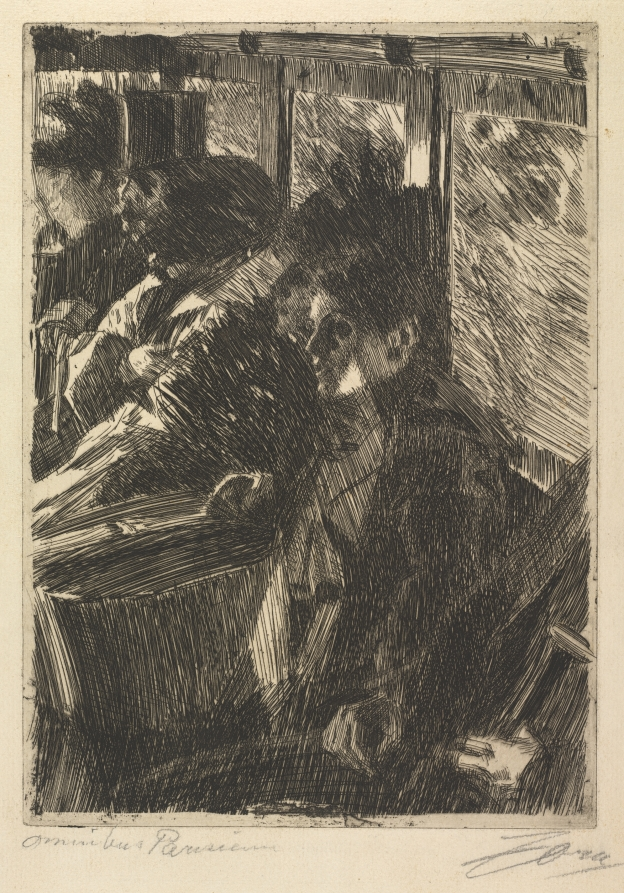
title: Omnibus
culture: Sweden, 19th century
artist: Anders Zorn (Swedish, 1860–1920)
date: 1892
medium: etching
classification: Print